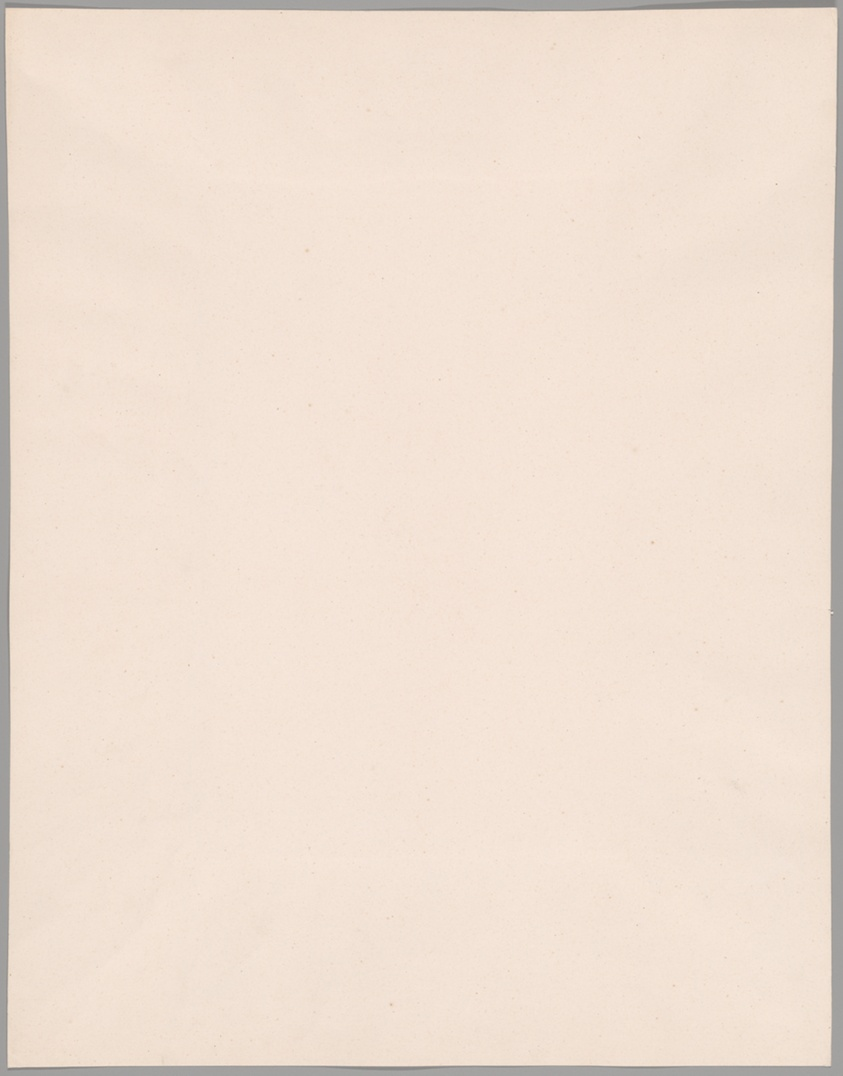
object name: Photograph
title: Angel, Sainte-Chapelle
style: 19th century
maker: Auguste Mestral; French, 1812–1884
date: 1853-54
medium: Salted paper print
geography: France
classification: photography; salted paper print; photographic process; photograph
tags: Paris